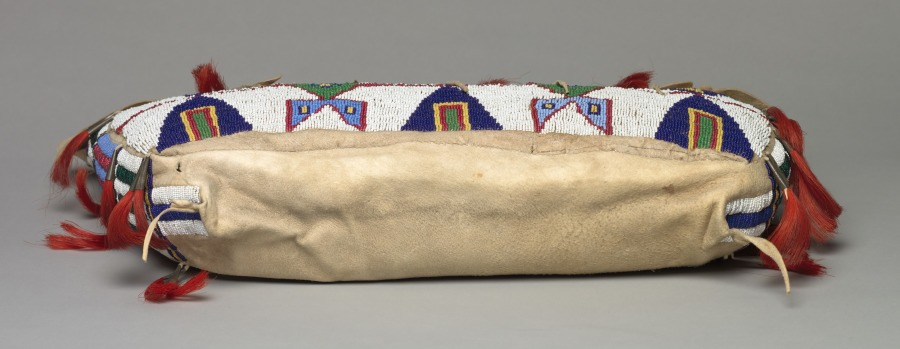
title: Storage Bag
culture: Native North America, Plains, Lakota (Sioux)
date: late 1800s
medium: Native-tanned hide, glass beads, dyed horsehair, tin cones, sinew thread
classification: Leather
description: Rectangular bags made of soft hide—known among early white traders as “possible bags” because they could hold “anything possible”—were used to store personal items inside the tipi, where they doubled as pillows. When encampments moved, the bags were carried on the side of a saddle, where their decoration could be admired.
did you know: Bags like this were used to store personal items inside the tipi, where they doubled as pillows.